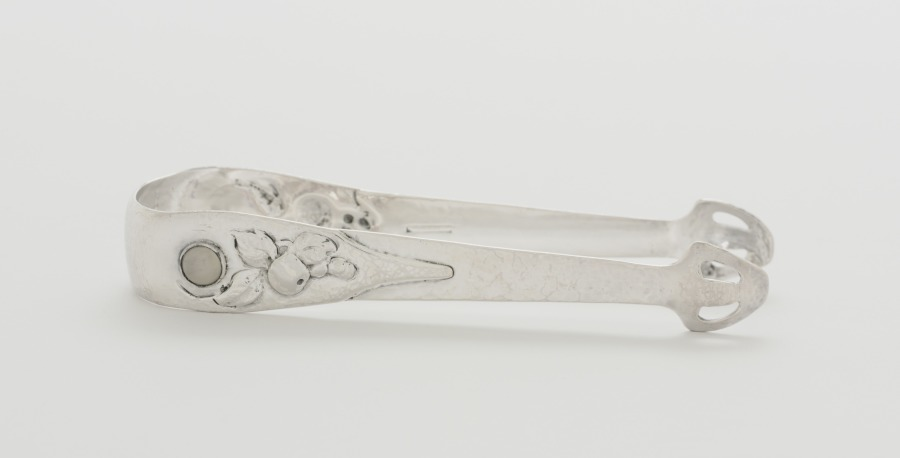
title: Tongs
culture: America, Ohio, Cleveland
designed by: Louis Rorimer (American, 1872–1939)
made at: and Rokesley Shop (American)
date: c. 1910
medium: silver, moonstones, ebony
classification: Silver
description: This tea and coffee service was designed for production by the Rokesley Shop, a collaborative group working at Louis Rorimer’s studio. Reacting against industrial mass production, Rorimer emphasized inventive design in finely crafted objects.